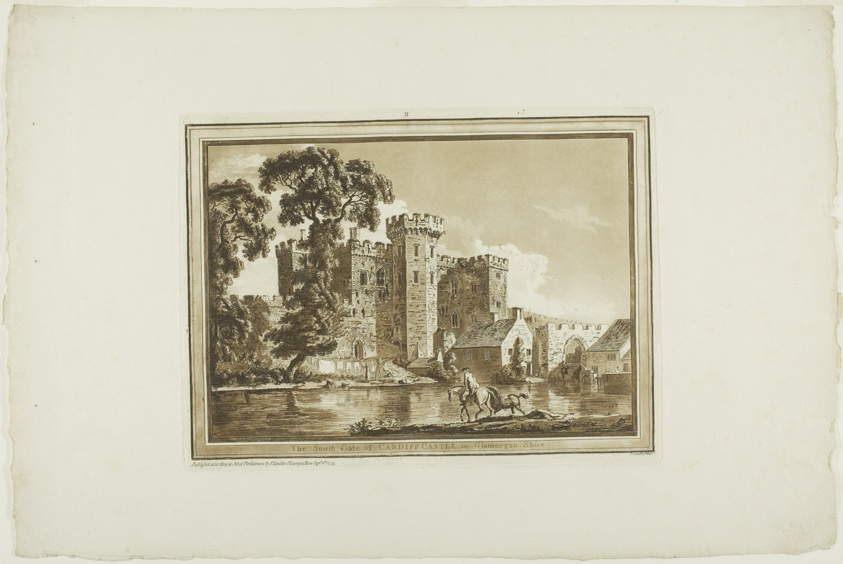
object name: Print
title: The South Gate of Cardiff Castle in Glamorgan Shire, plate two from Twelve Views in South Wales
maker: Paul Sandby (English, 1731-1809)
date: 1775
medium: Aquatint with etching on ivory laid paper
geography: England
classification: aquatint; print; prints and drawing